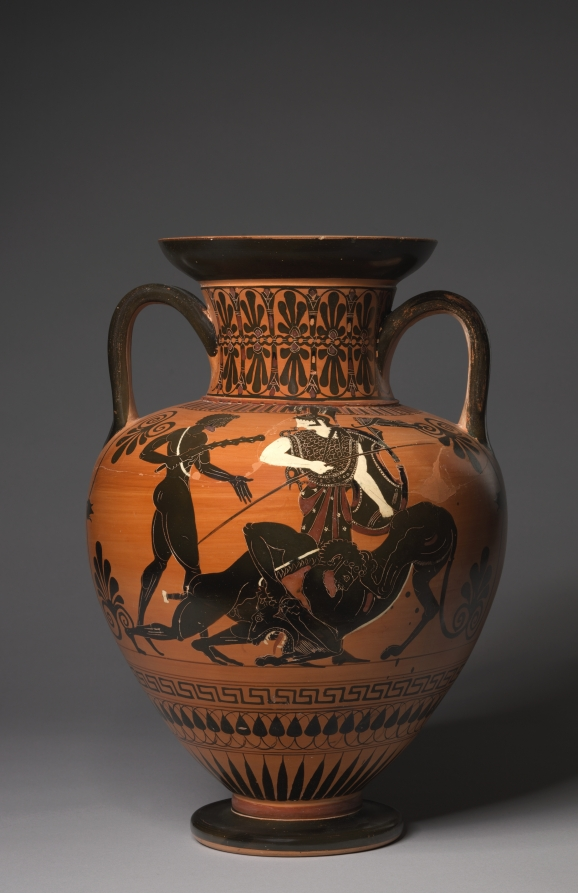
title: Black-Figure Neck-Amphora (Storage Vessel): Herakles and Nemean Lion (A); Dionysos, Satyrs, and Maenads (B)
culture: Greek, Attic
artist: attributed to Painter of Berlin 1899 (Greek, Attic)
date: 515–510 BCE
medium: ceramic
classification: Ceramic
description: The neck-amphora, one of the most popular vase shapes in Archaic Athens, provided painters with ample space for both figural and ornamental decoration. Herakles, the greatest of Greek heroes, performs his most famous deed on the obverse, wrestling the Nemean lion. His patron goddess Athena, together with his nephew Iolaos, holding the hero’s club, stand by. On the other side is an unrelated scene, showing the wine god Dionysos with dancing maenads and satyrs. Abundant ornament covers other areas: stylized lotus blossom and palmette chains on the neck; intricately linked palmettes and lotuses beneath each handle; and a key pattern, linked lotus buds, and rays on the lower body.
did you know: After Herakles strangled the Nemean lion, he wore its pelt as a protective trophy.